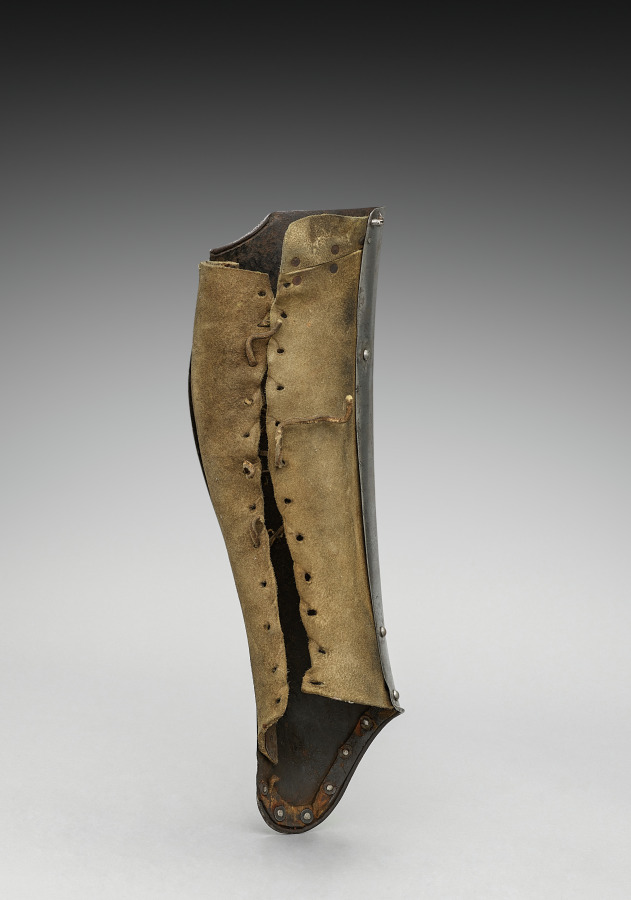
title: Left Greave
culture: Germany, 19th century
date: 1801–1900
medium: steel with black paint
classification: Arms and Armor